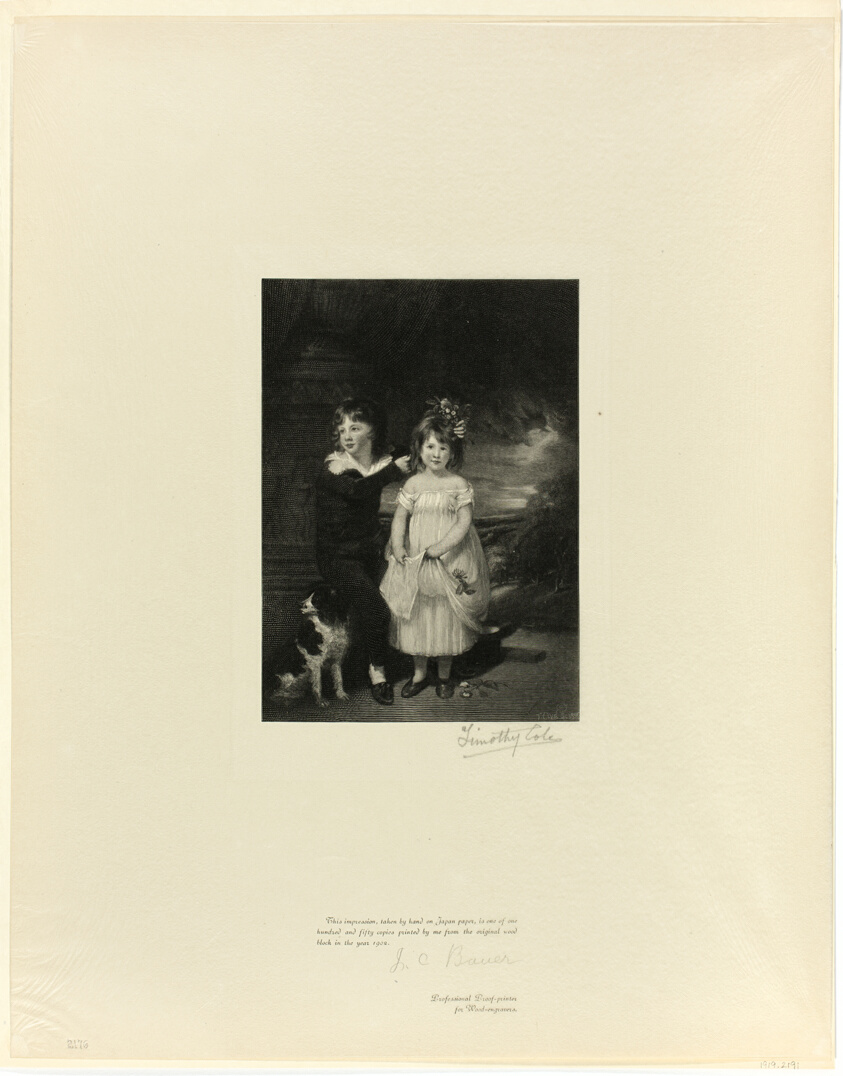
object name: Print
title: Brother and Sister, from Old English Masters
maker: Timothy Cole (American, born England, 1852-1931); after Sir William Beechey (English, 1753-1839)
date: 1898, printed 1902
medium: Wood engraving on chine paper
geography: United States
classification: wood engraving; print; prints and drawing